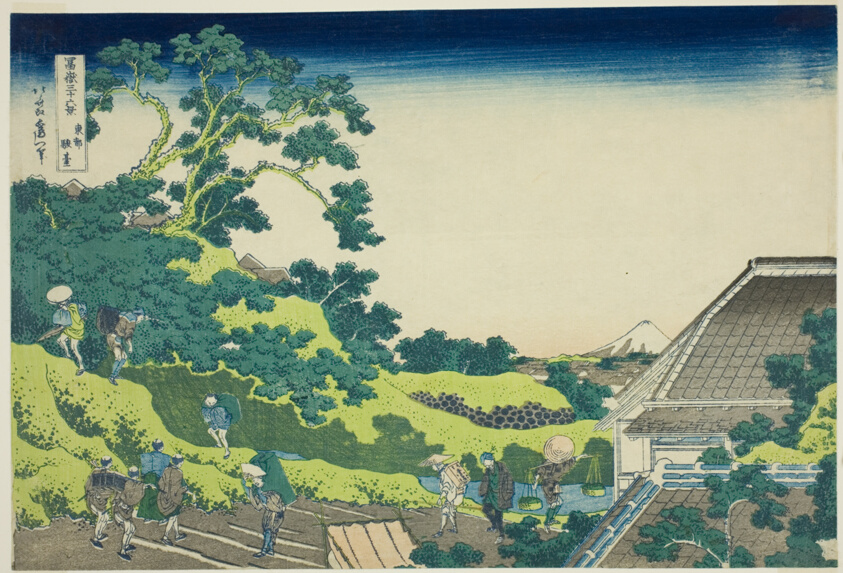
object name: Print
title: Surugadai in Edo (Toto surugadai), from the series "Thirty-six Views of Mount Fuji (Fugaku sanjurokkei)"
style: Japanese (culture or style)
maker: Katsushika Hokusai 葛飾 北斎; Japanese, 1760-1849; Publisher: Hibino Yohachi; Japanese, unknown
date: c. 1830/33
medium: Color woodblock print; oban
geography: Japan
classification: woodblock print; print; asian art